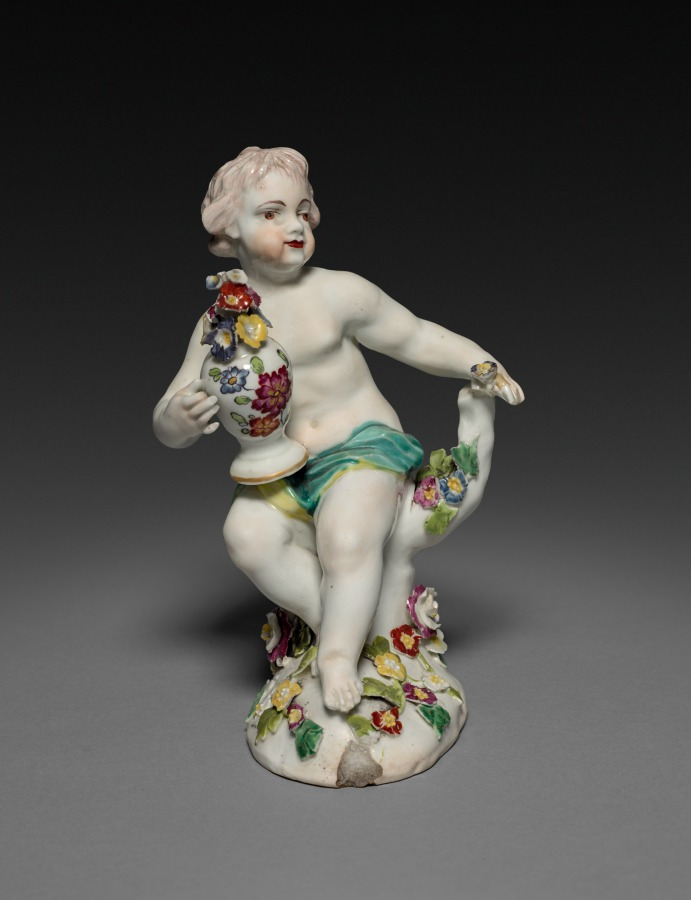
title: Spring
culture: England, Derby, 18th century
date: c. 1760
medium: soft-paste porcelain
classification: Ceramic